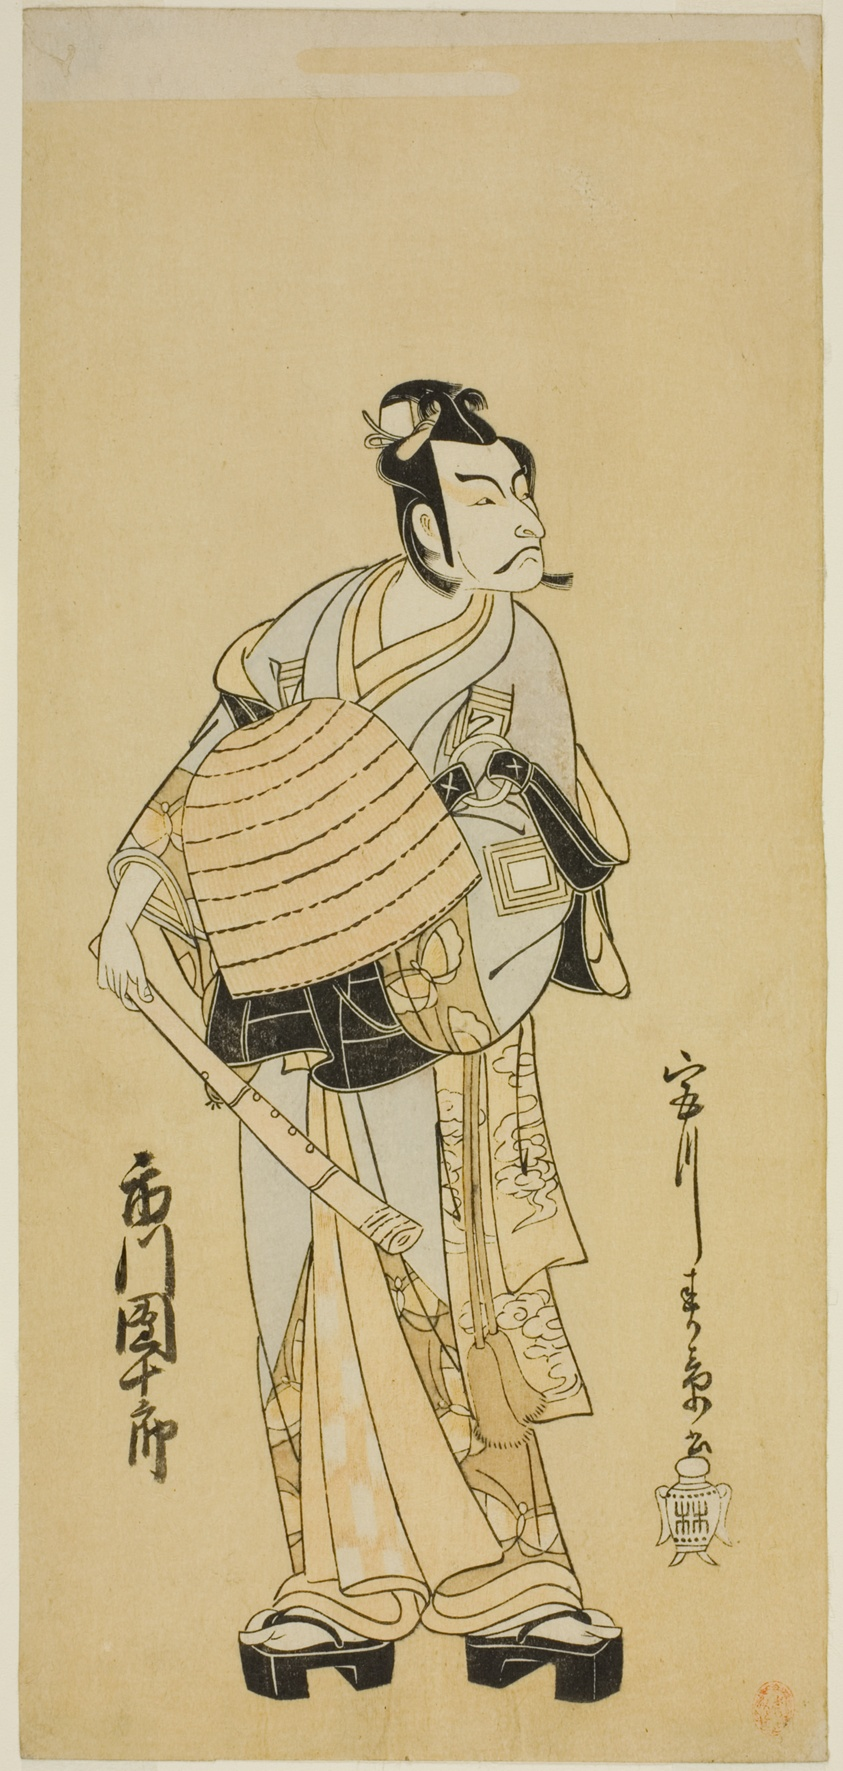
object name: Print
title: The Actor Ichikawa Danjuro V as Soga no Goro Disguised as a Komuso in the Play Sakai-cho Soga Nendaiki, Performed at the Nakamura Theater in the First Month, 1771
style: Japanese (culture or style)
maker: Katsukawa Shunsho 勝川 春章; Japanese, 1726-1792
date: c. 1771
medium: Color woodblock print; hosoban; from a multisheet composition (?)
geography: Japan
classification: woodblock print; print; asian art